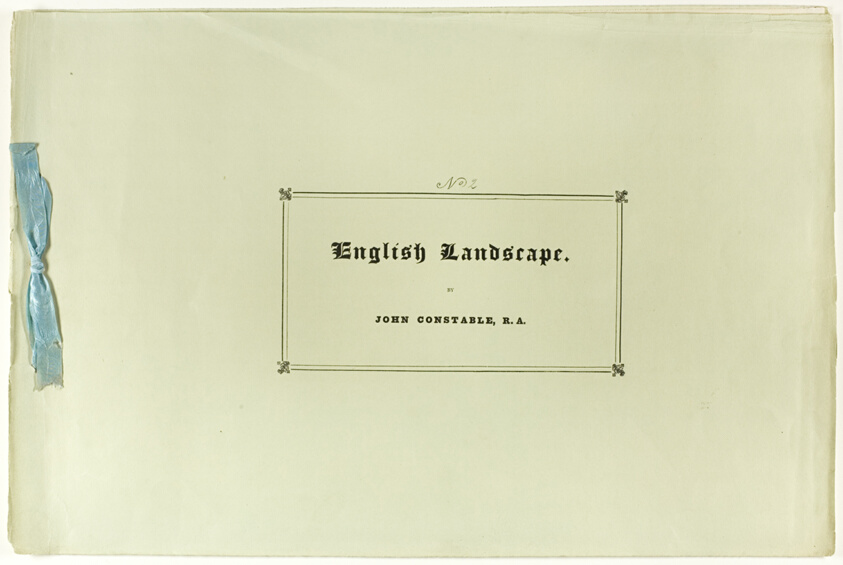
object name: Print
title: Various Subjects of Landscape Characteristic of English Landscape Scenery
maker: David Lucas (English, 1802-1881); after John Constable (English, 1776-1837)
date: 1830/32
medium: Portfolio cover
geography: England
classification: portfolio cover; portfolio; prints and drawing; print